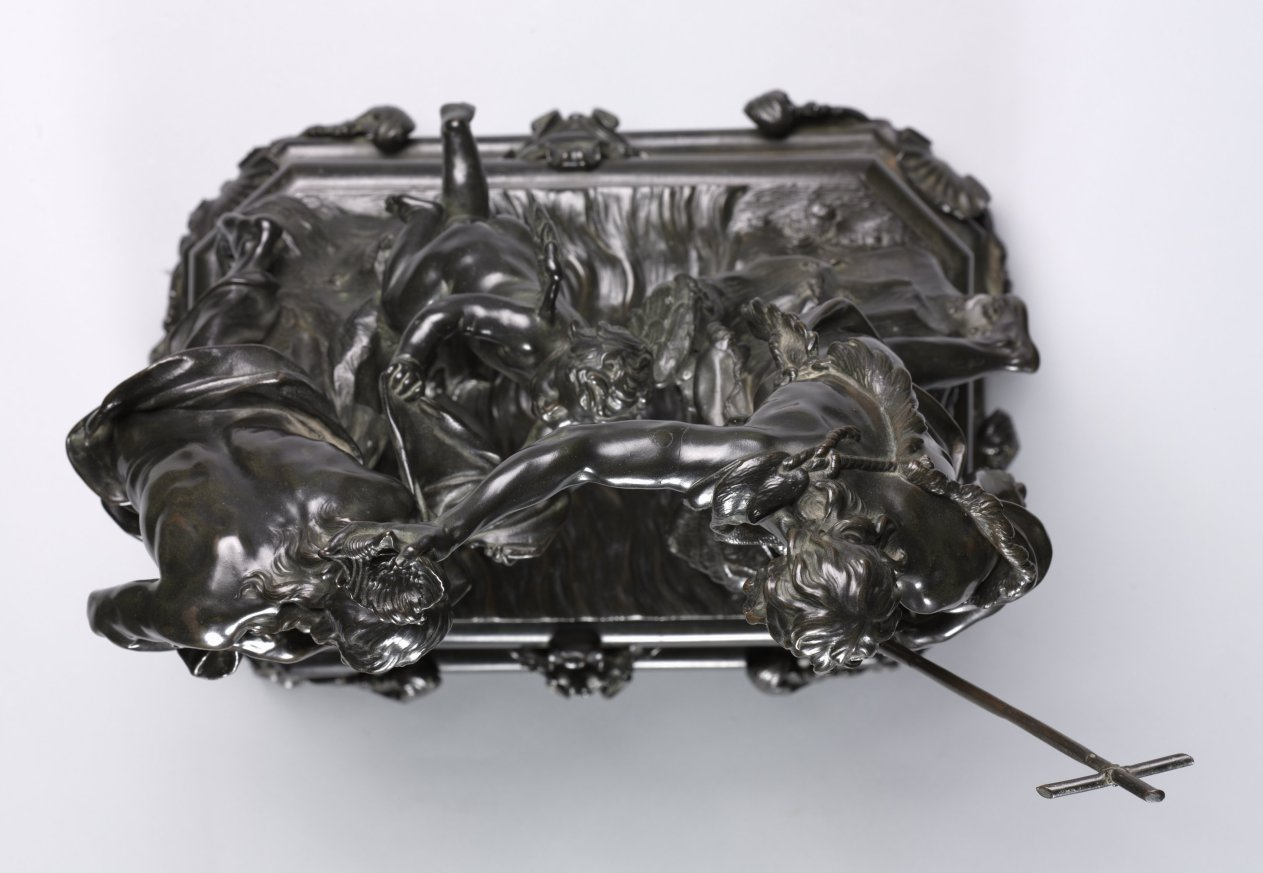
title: Baptism of Christ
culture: Italy, 17th century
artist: Alessandro Algardi (Italian, 1598–1654)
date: designed 1645–46, probably made 1650–55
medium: bronze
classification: Sculpture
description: When Innocent X (Giovanni Battista Pamphili, ruled 1644–55) became pope, Alessandro Algardi endeavored to obtain his patronage. This bronze Baptism of Christ is a casting from the molds used for an original silver sculpture that Algardi presented to the new pope to gain his support in 1646. The composition depicts an important scene in the life of Christ. On the right is John the Baptist, who pours water onto Jesus's head from a shell. As Christ bows his head to be baptized, a little angel holds the edge of his cloak. Algardi worked carefully to make this piece exciting from a number of points of view. Its dramatic emphasis shifts, depending on the viewer's vantage point.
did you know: Algardi's sculpture plays on its intended recipient's given name: Giovanni Battista (John the Baptist).